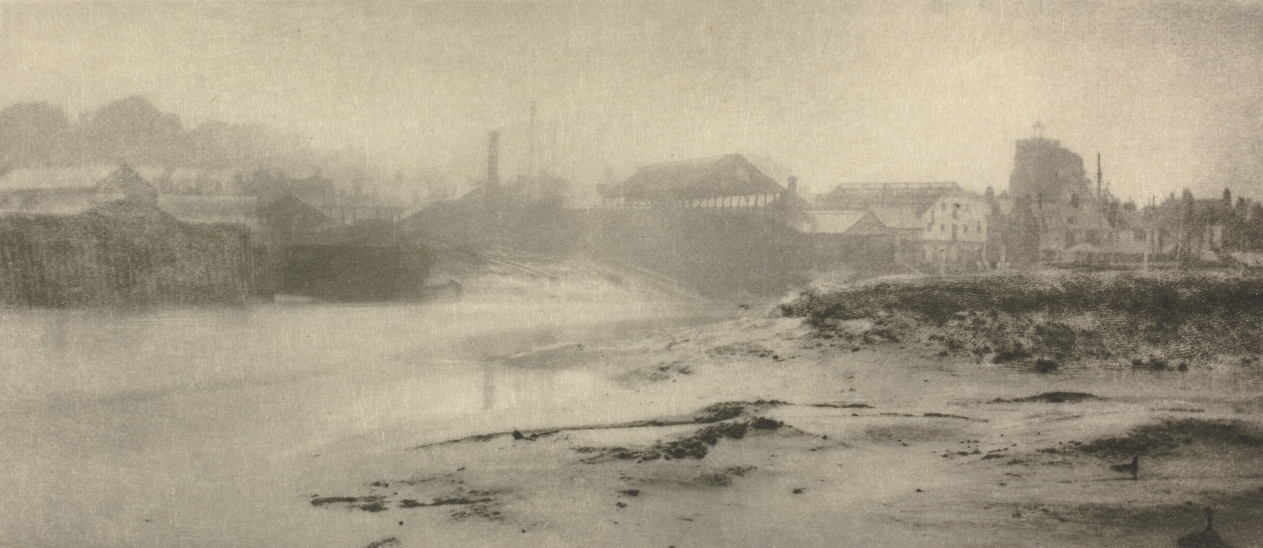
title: Camera Work: Wyvenhoe on the Colne in Essex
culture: England, 20th century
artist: George Davison (British, 1856–1930)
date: 1907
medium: photogravure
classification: Bound Volume